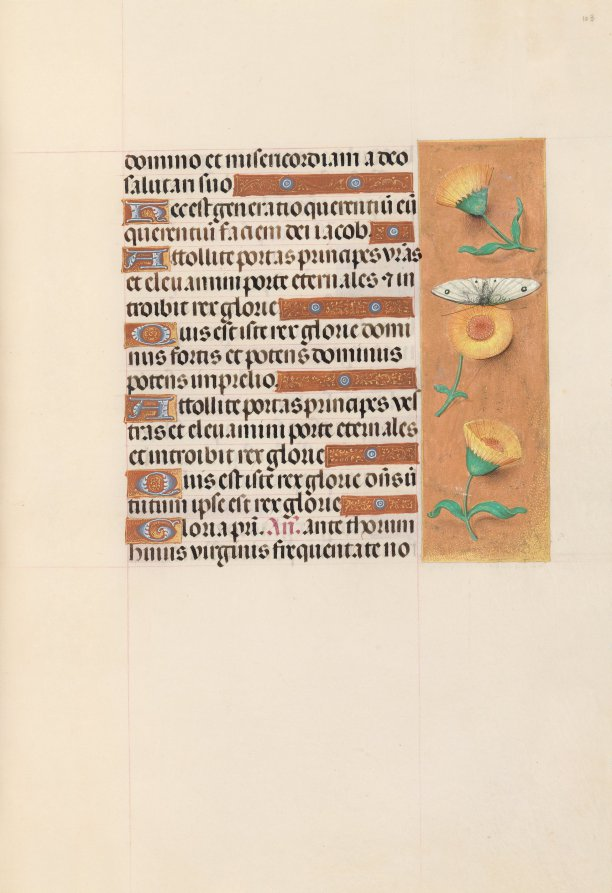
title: Hours of Queen Isabella the Catholic, Queen of Spain: Fol. 103r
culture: Flanders, Ghent and Bruges, late 15th century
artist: Master of the First Prayerbook of Maximillian (Flemish, c. 1444–1519)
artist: and Associates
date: c. 1500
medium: ink, tempera, and gold on vellum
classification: Bound Volume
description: This manuscript was illuminated by a circle of at least five highly organized manuscript painters active in the Flemish cities of Ghent and Bruges. The principal illuminator was Alexander Bening, who painted the majority of the book's miniatures. Manuscripts produced by this circle of artists are renowned for the decoration of their borders, which typically feature a rich variety of realistically-painted flowers, birds, and butterflies. This prayer book, called a book of hours, was intended not for a cleric, but for the private devotions of a lay person-in this case, Isabella the Catholic, Queen of Spain (1451-1504). Isabella's coat of arms embellishes the book's frontispiece. It is unlikely that the book was commissioned by the Queen herself; rather, she probably received it as a diplomatic gift from someone courting her patronage, perhaps Cardinal Francisco Jimenez de Cisneros. A Franciscan friar, Jimenez was dependent upon Isabella for his advancement, first to the post of Queen's confessor in 1492, and then to Archbishop of Toledo in 1495.